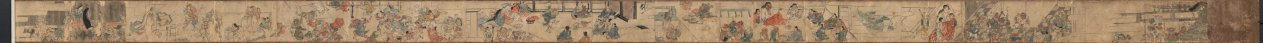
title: Oeyama Engi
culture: Japan, Edo period (1615–1868)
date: 1615–1868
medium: one of a pair of handscrolls; ink and color on paper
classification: Painting